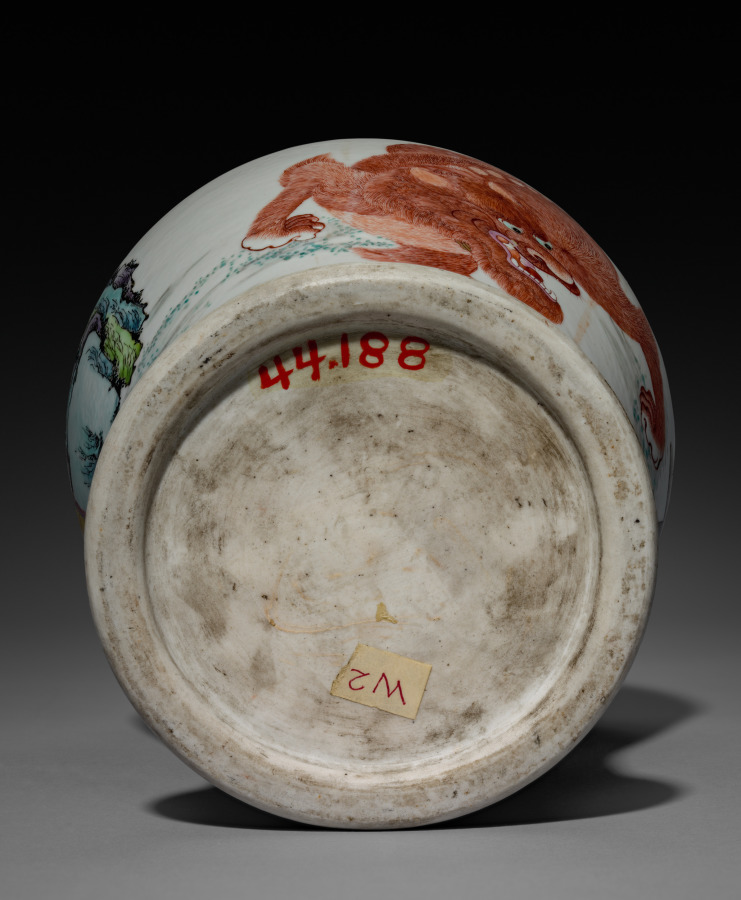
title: Vase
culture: China, Qing dynasty (1644–1911), Qianlong reign (1736–95)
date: 1736–95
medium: porcelain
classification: Ceramic